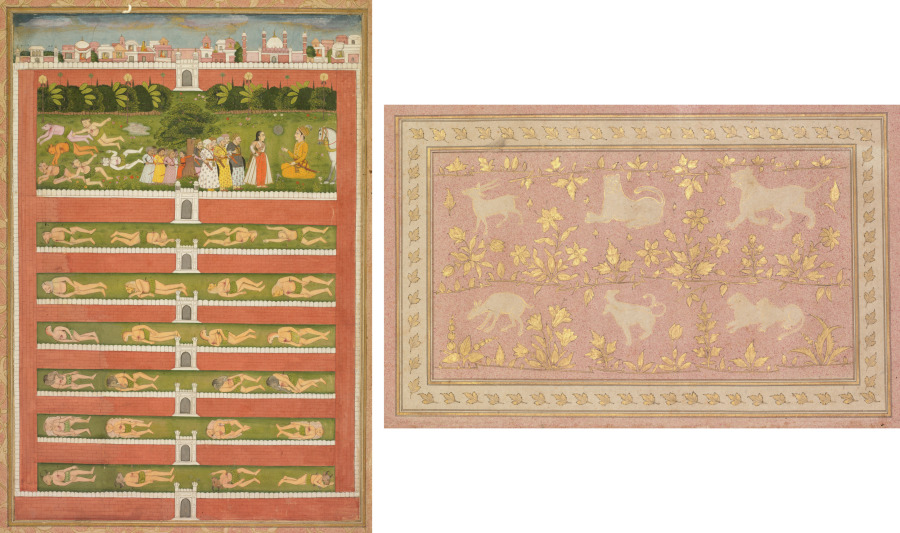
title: A Princess and Demons before a Nobleman: A Leaf from a Poetical Romance Relating to Shah Alam I (recto); Stenciled Scenes of Lion and Gazelle (verso)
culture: Mughal India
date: c. 1710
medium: Gum tempera, ink, and gold on paper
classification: Painting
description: The source story of this painting remains enigmatic to scholars, but it includes a range of depictions of the “other”––from the foreign to the demonic. A prince kneeling in front of his horse addresses a lady; the moon in front of her face may identify her as Mahliqa (“moonlike” in Arabic), the Chinese princess identified by inscription on the adjacent page. A group of men whose eyes hang vertically stand behind her. Horned figures with grass skirts lie slain behind them, presumably killed by the kneeling prince conspicuously holding a bow. The city in the background, at the top of the painting, is populated solely by women, and its eight surrounding walls are interspersed with slain composite creatures wearing leaf skirts, which may identify them as bands of forest-dwellers, or tribal groups.